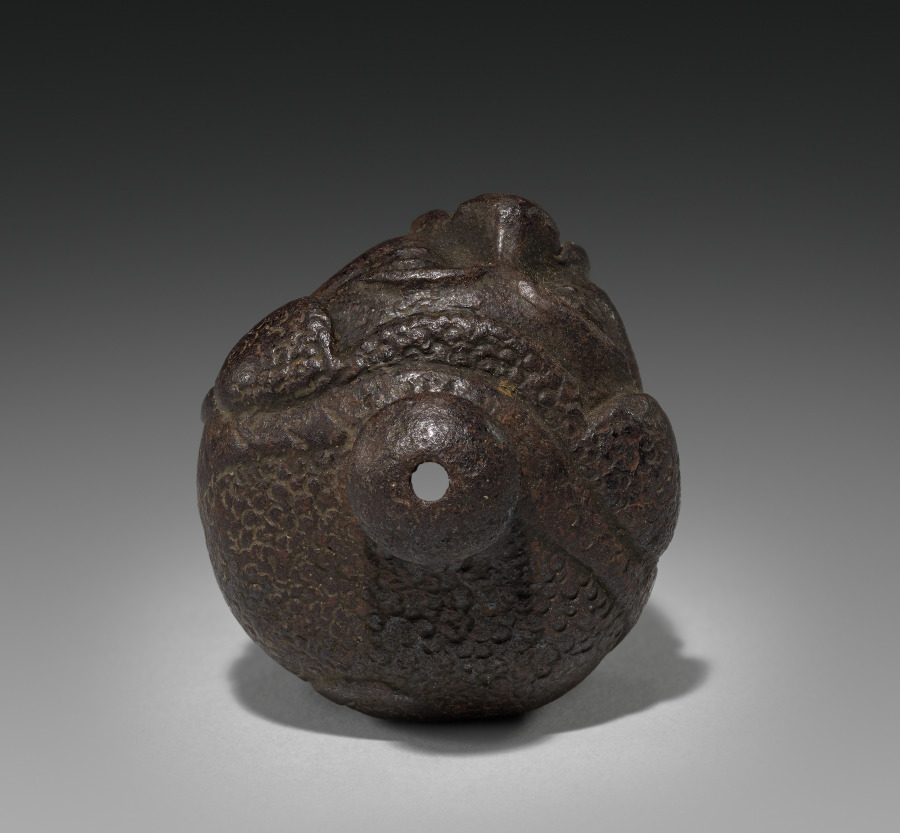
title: Pommel of Sword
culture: Italy, 17th century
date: 1600s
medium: steel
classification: Arms and Armor